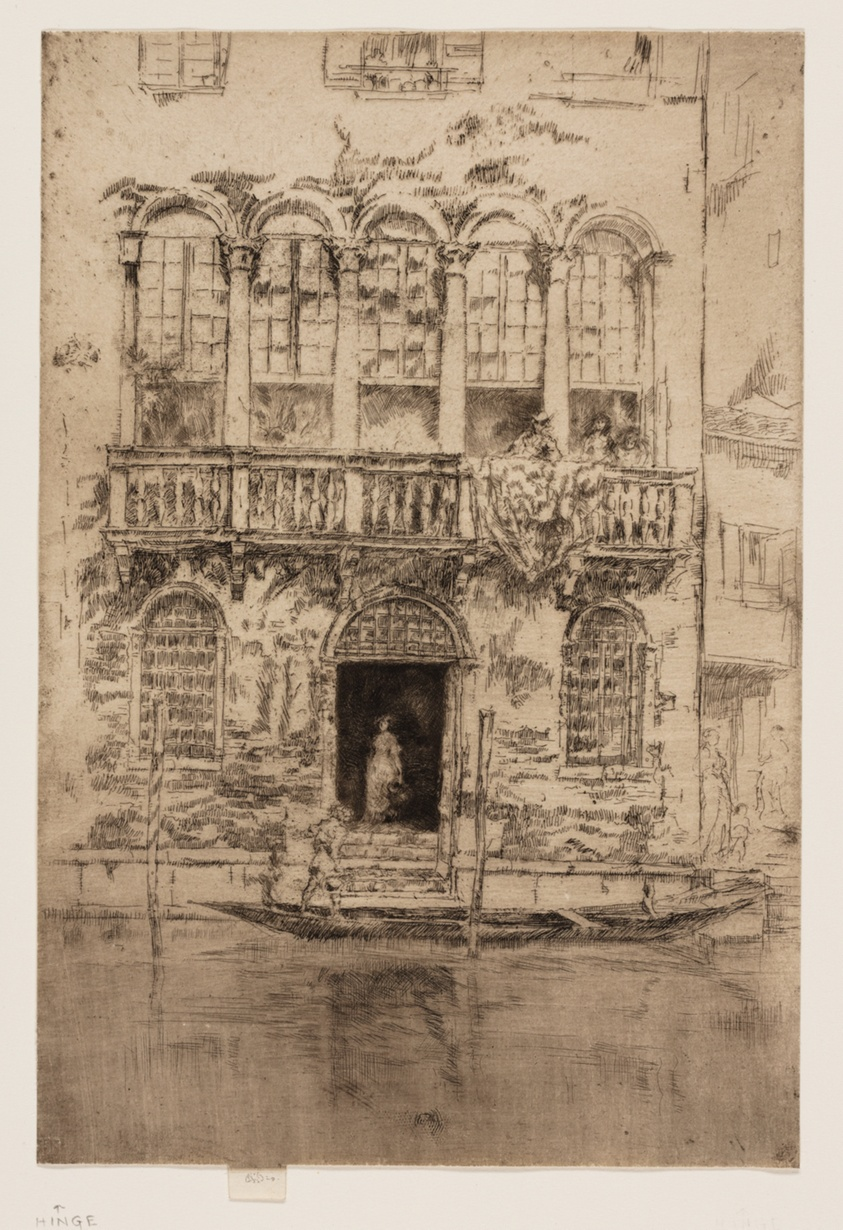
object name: Print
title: The Balcony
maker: James McNeill Whistler (American, 1834-1903)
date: 1879/80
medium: Etching and drypoint with foul biting in dark brown ink on ivory laid paper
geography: United States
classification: etching; foul biting; print; prints and drawing; drypoint; paper